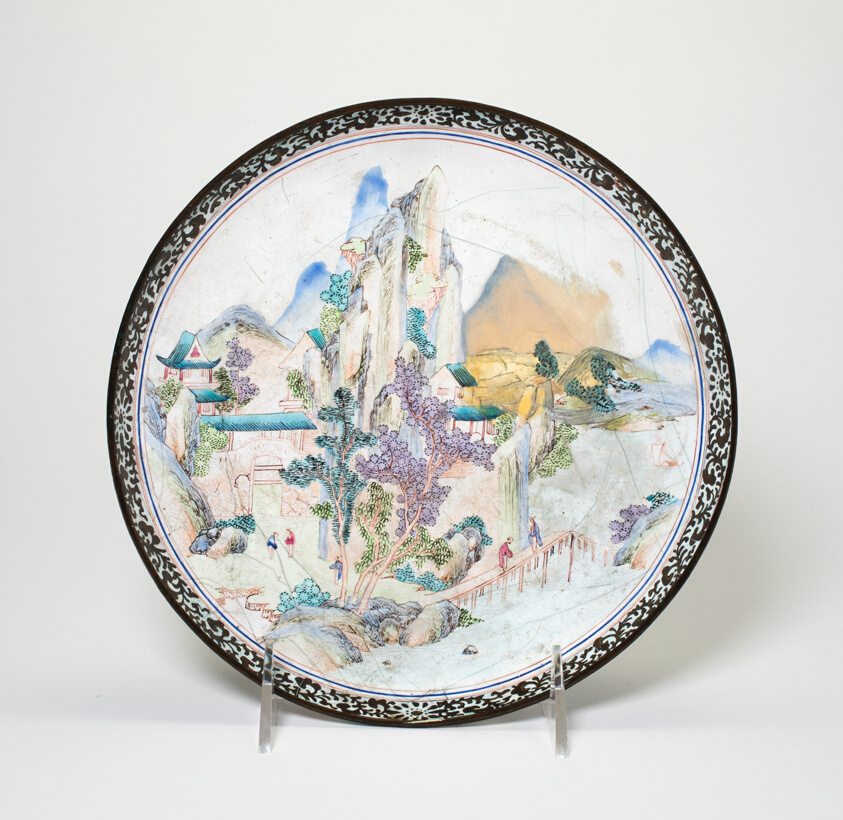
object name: Vessel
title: Dish with Moutain Landscape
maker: China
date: Qing dynasty (1644–1911), Qianlong period (1736–1796)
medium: Famille-rose enamel on copper or brass base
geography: Guangdong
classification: porcelain; ceramics; asian art